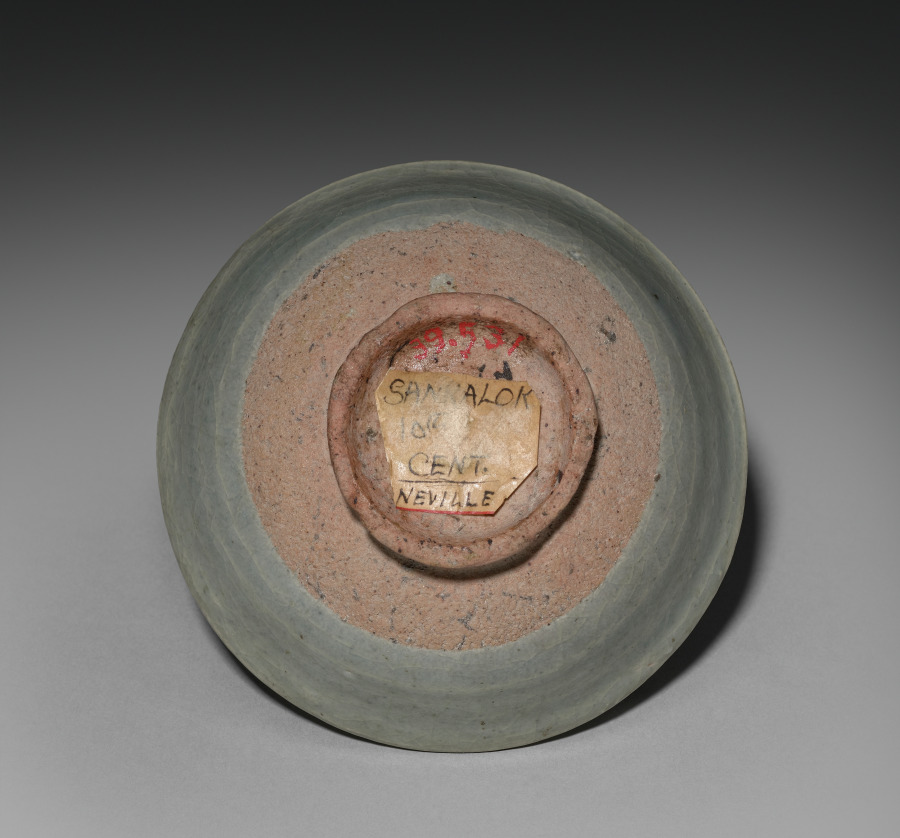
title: Bowl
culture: Siam, Sawankhalok ware, late 13th-14th Century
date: late 1200s-1300s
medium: stoneware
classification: Ceramic